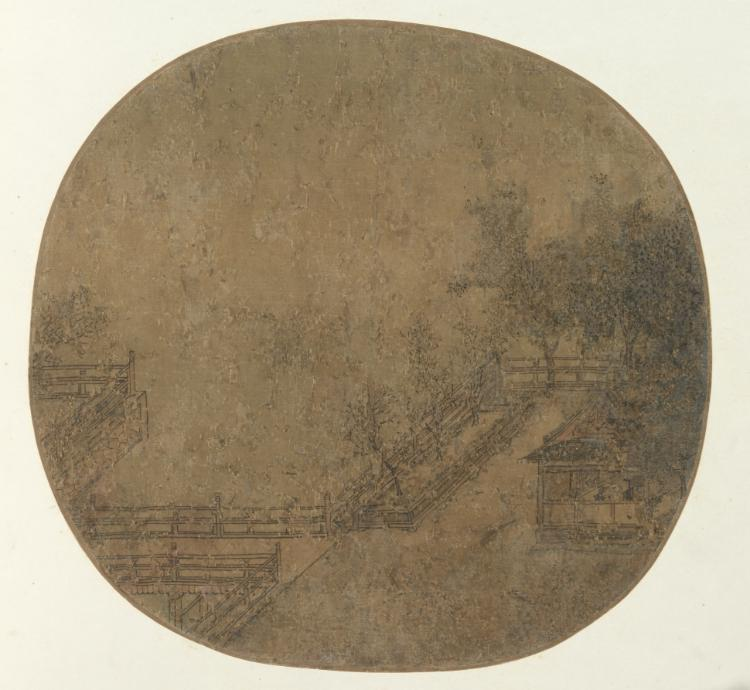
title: Mountain Terrace and Pavilion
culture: China, Song dynasty (960-1279)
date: 960–1279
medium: Album leaf, ink on silk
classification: Painting